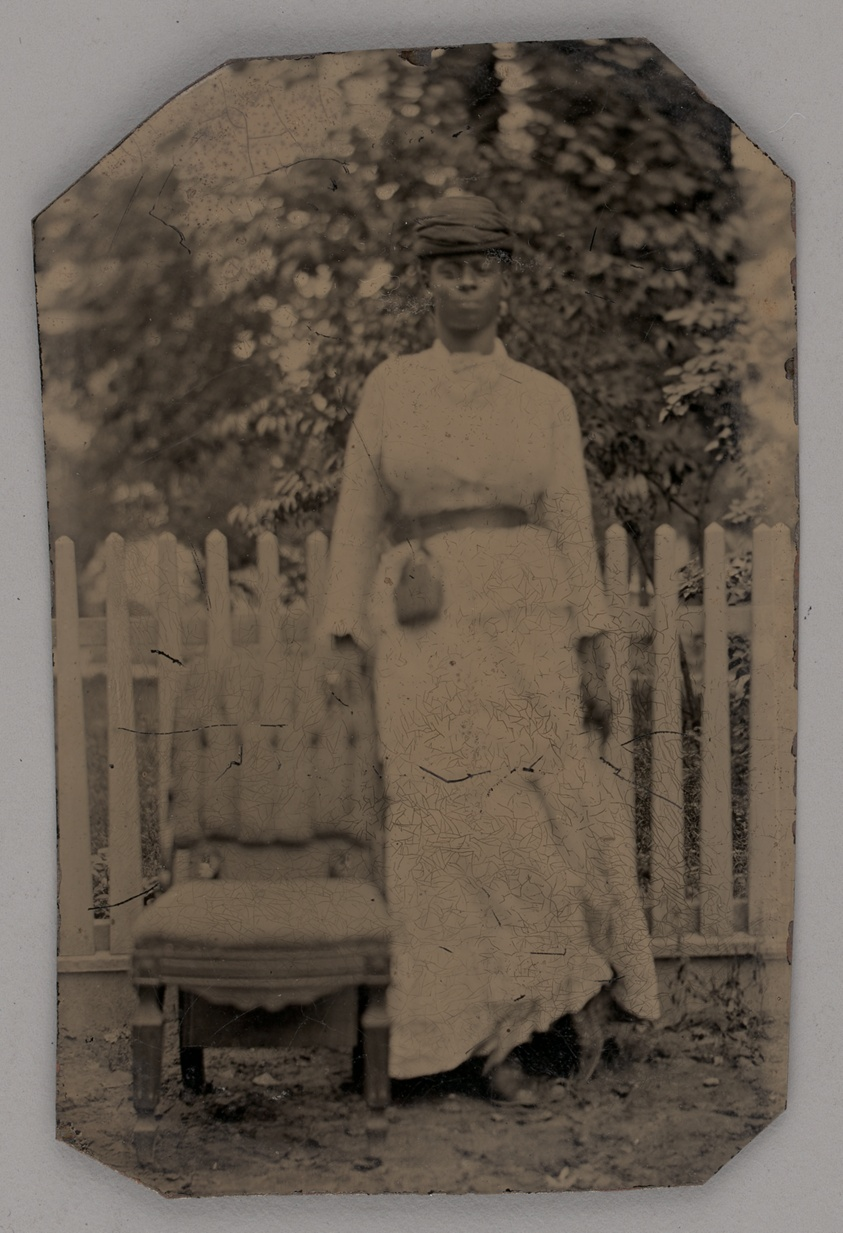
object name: Photograph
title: Untitled (Portrait of a Standing Woman)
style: 19th century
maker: Unknown maker; American, 19th century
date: 1880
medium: Tintype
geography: United States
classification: portrait; tintype; photograph; photographic process; photography; portrait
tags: portraits: African American subject, woman, portrait, women, portraits: female subject, lundberg collection, African American, portraits